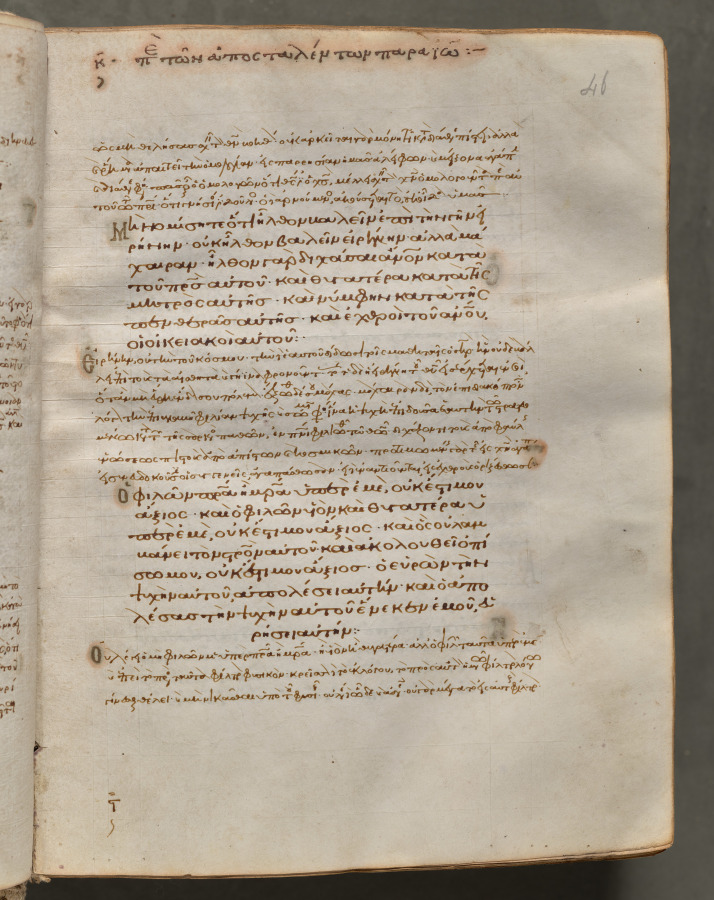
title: Text, folio 46 (recto), from a Gospel Book with Commentaries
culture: Byzantium, Constantinople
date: c. 1000–1100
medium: ink, tempera, and gold on vellum; leather binding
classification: Bound Volume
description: Each of the four gospels in this book opens on a page with brilliantly illuminated borders depicting the author of the text as well as birds-principally peacocks, symbols of the immortality of the soul-and fountains, representing the fountain of life and the salvation of the soul. This volume consists of 428 leaves with texts in Greek. Its level of sophistication suggests that it was probably written and decorated in a monastery in Constantinople.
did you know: Gospel Books were carried in procession through Byzantine churches.